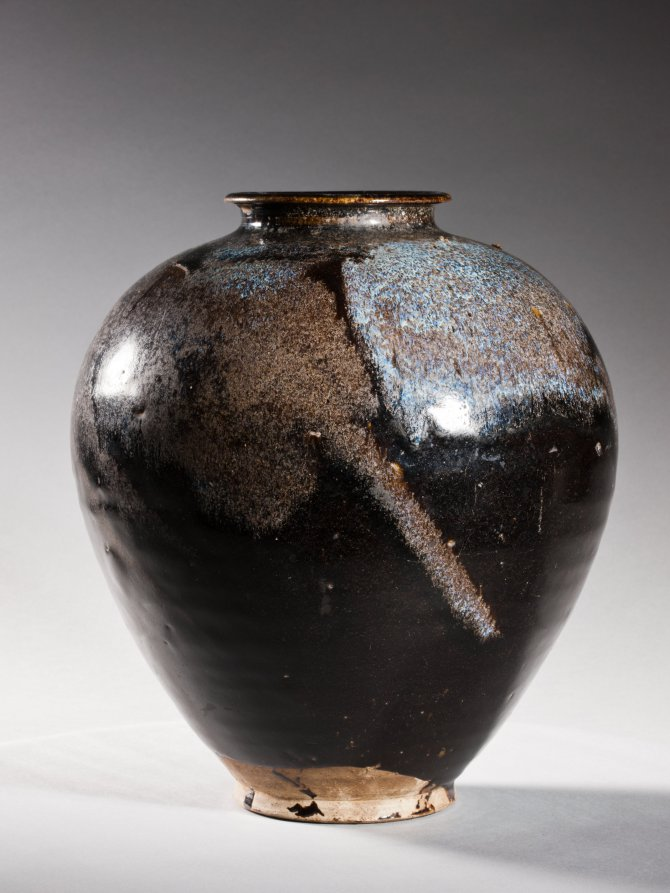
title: Jar: Black Ware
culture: China, Henan province, Huangdao kilns, Tang dynasty (618-907)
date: 700s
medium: glazed stoneware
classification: Ceramic